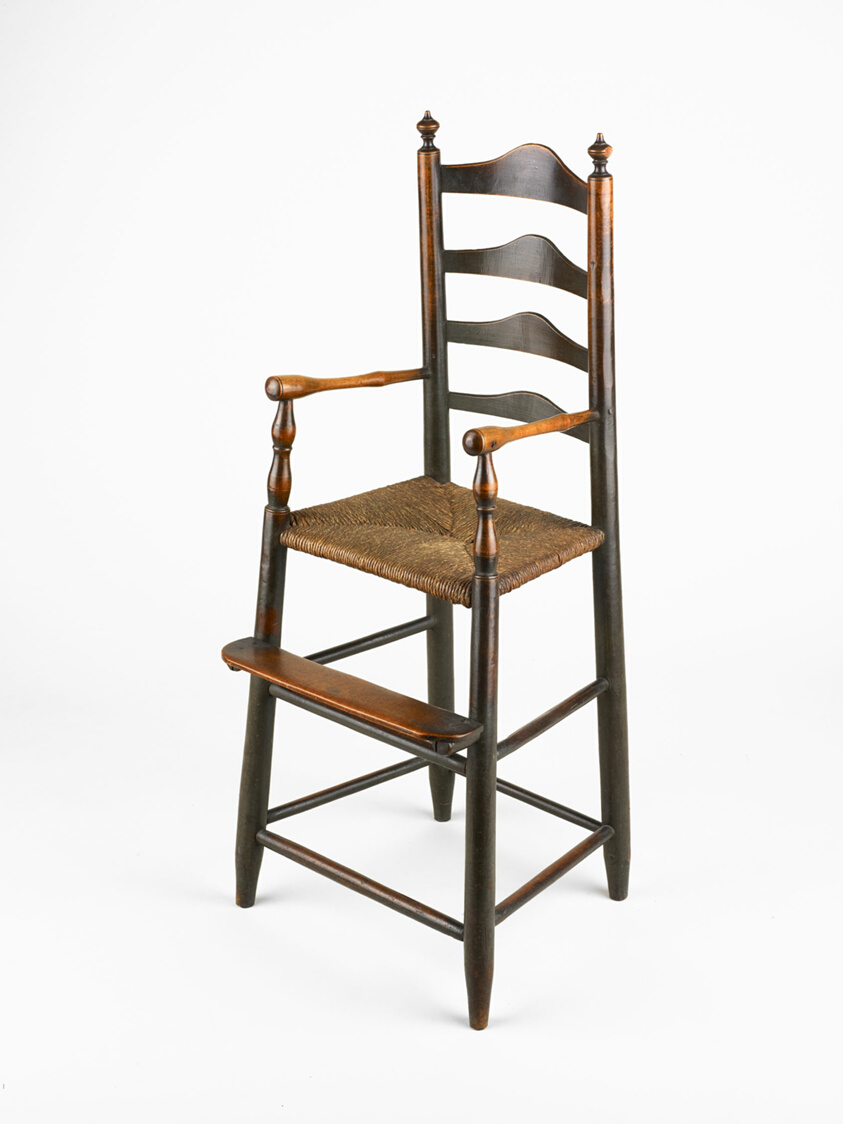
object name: Furniture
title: High Chair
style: Folk Art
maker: Artist unknown (American, 18th century); Pennsylvania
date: 1740–75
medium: Walnut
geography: Pennsylvania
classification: seating; furniture; american decorative arts; american arts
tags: furniture